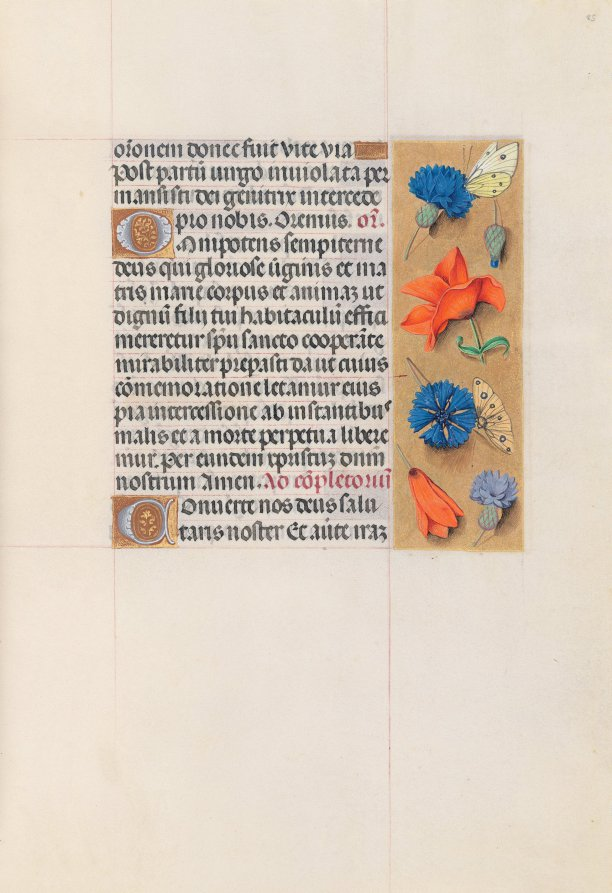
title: Hours of Queen Isabella the Catholic, Queen of Spain: Fol. 85r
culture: Flanders, Ghent and Bruges, late 15th century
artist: Master of the First Prayerbook of Maximillian (Flemish, c. 1444–1519)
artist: and Associates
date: c. 1500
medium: ink, tempera, and gold on vellum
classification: Bound Volume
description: This manuscript was illuminated by a circle of at least five highly organized manuscript painters active in the Flemish cities of Ghent and Bruges. The principal illuminator was Alexander Bening, who painted the majority of the book's miniatures. Manuscripts produced by this circle of artists are renowned for the decoration of their borders, which typically feature a rich variety of realistically-painted flowers, birds, and butterflies. This prayer book, called a book of hours, was intended not for a cleric, but for the private devotions of a lay person-in this case, Isabella the Catholic, Queen of Spain (1451-1504). Isabella's coat of arms embellishes the book's frontispiece. It is unlikely that the book was commissioned by the Queen herself; rather, she probably received it as a diplomatic gift from someone courting her patronage, perhaps Cardinal Francisco Jimenez de Cisneros. A Franciscan friar, Jimenez was dependent upon Isabella for his advancement, first to the post of Queen's confessor in 1492, and then to Archbishop of Toledo in 1495.